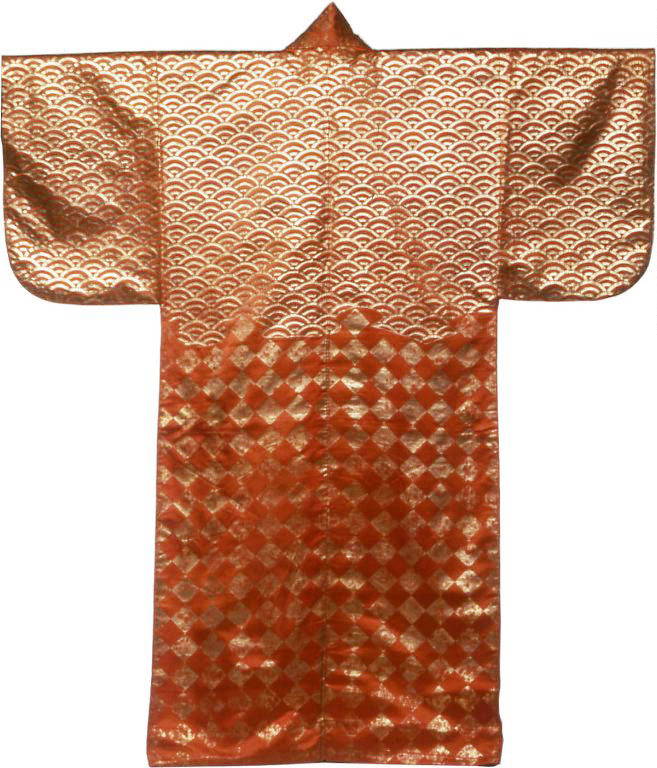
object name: Textile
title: Surihaku (Noh Costume)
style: edo (japanese period), late edo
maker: Japan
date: Edo period (1615–1868), 1775/1825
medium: Silk, warp-float faced 7:1 satin weave; patterned with impressed gold leaf; lined with silk, plain weave; dyed with beni, safflower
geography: Japan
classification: textile; costume - weaving; costume; kimonos